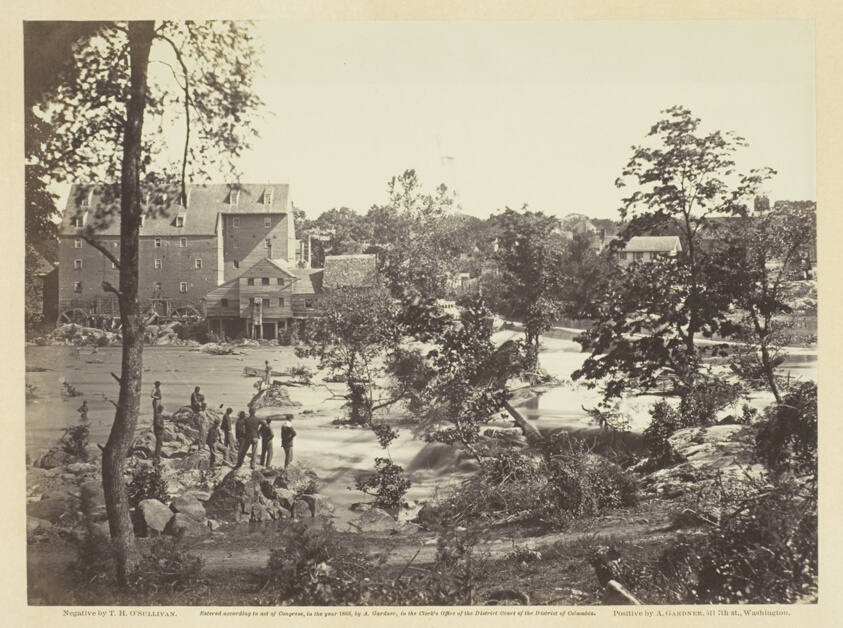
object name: Photograph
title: Johnson Mill, Petersburg, Virginia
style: 19th century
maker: Timothy O'Sullivan (American, born Ireland, 1840–1882)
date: May 1865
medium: Albumen print, pl. 80 from the album "Gardner's Photographic Sketch Book of the War, Volume II" (1866)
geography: United States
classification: photograph; albumen silver print; photography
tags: Collected by Hugh Edwards, Gardner's Photographic Sketch Book